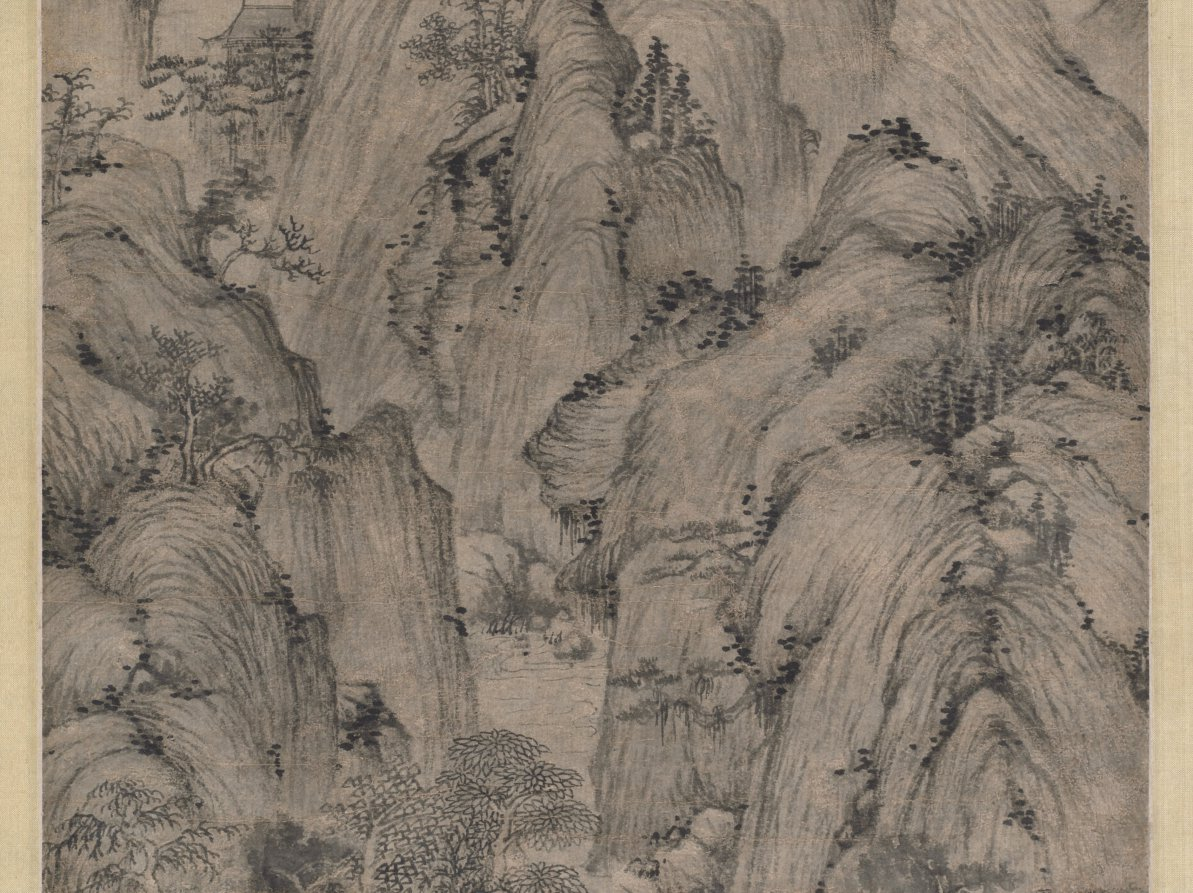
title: Streams and Mountains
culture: China, Yuan dynasty (1271-1368)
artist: Xu Ben (Chinese, 1335–1380)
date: 1372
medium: hanging scroll, ink on paper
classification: Painting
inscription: 綠樹黃鸝處處山， 偶從谿上看雲還。/ 人生未許全無事， 纔得登臨便是閑。 壬子七月十日徐賁為吉夫先生畫 並詩共上 [印] 幼文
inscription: Label on mounting probably by Liang Qingbiao 梁清標 (1620–1691).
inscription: 4 additional inscriptions and 9 additional seals: 1 poem of Xie Hui 謝徽 (c. 2nd half 14th c.); 1 poem and 1 seal of Gao Qi 高啟 (1336–1374); 1 poem and 1 seal of Lu Zhen 盧貞 (c. late 14th c.); 1 poem of Huang Zai 黃載; 3 seals of Liang Qingbiao 梁清標 (1620–1691); 1 seal of Wang Jiqian [C. C. Wang] 王季遷 (1907–2003); 3 seals unidentified.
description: Like many literati of the late Yuan and early Ming dynasties, Xu Ben was entangled with the perils of dynastic change as well as the ups and downs of his official career. It was mainly through the art of painting and poetry, as well as the ideal of reclusion, that he sought feelings of exhilaration and shared them with his friends. Xu created this monumental landscape during one of his periods of reclusion. His innumerable “hemp-fiber” texture strokes create a unifying rhythm among the towering mountains with tightly knit masses of rocks. Nestled among shady trees at the base of the mountain is a rustic retreat, which a scholar approaches on foot to visit with the hermit. Among the five inscriptions at the top of the painting is one by the artist himself. He dedicated the painting to someone named Jifu 吉夫 and recorded a poem in praise of mountains. Green trees, yellow orioles, everywhere are mountains; Aimlessly I return from the stream, where I watched the clouds. Man's life does not allow unbroken ease, But to be able to be high up in the mountain, this is leisure.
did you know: An attendant opens a reed gate to welcome the scholar with a walking stick approaching the rustic retreat.